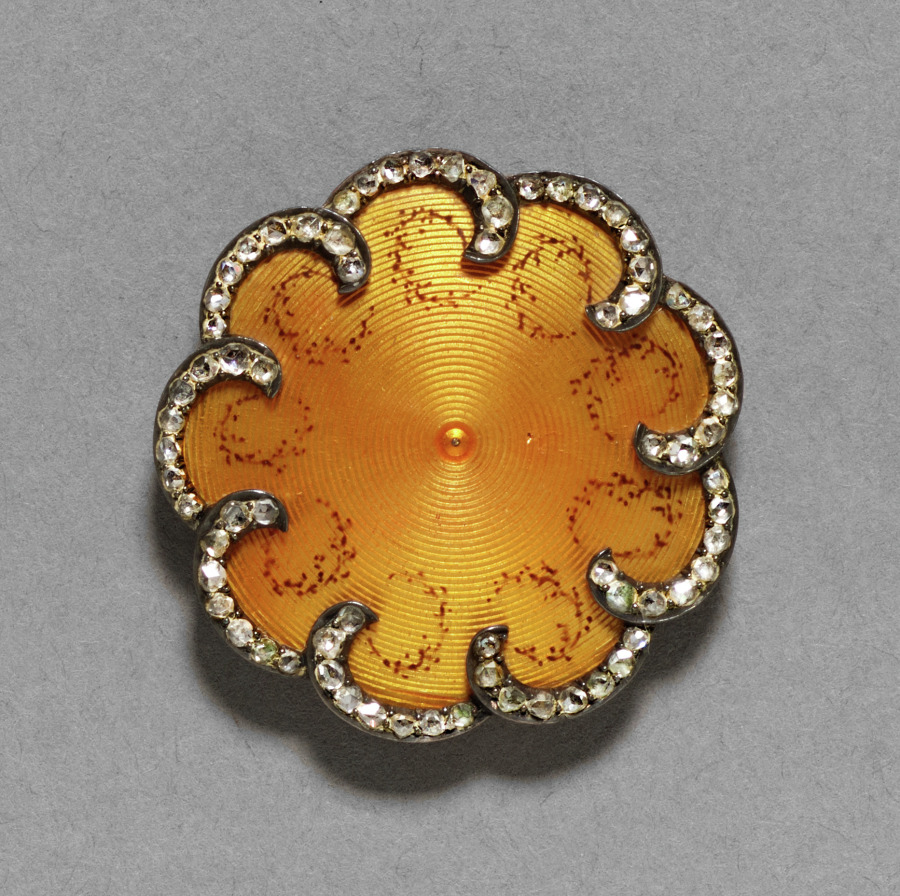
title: Button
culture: Russia, St. Petersburg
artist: firm of Peter Carl Fabergé (Russian, 1846–1920)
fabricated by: August Wilhelm Holmström (Russian, 1929–1903)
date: after 1896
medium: gold, enamel, diamonds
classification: Miscellaneous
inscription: inscribed: double-headed eagle; Fabergé; St. Petersburg, Moscow (all in Cyrillic; inside lid of box).